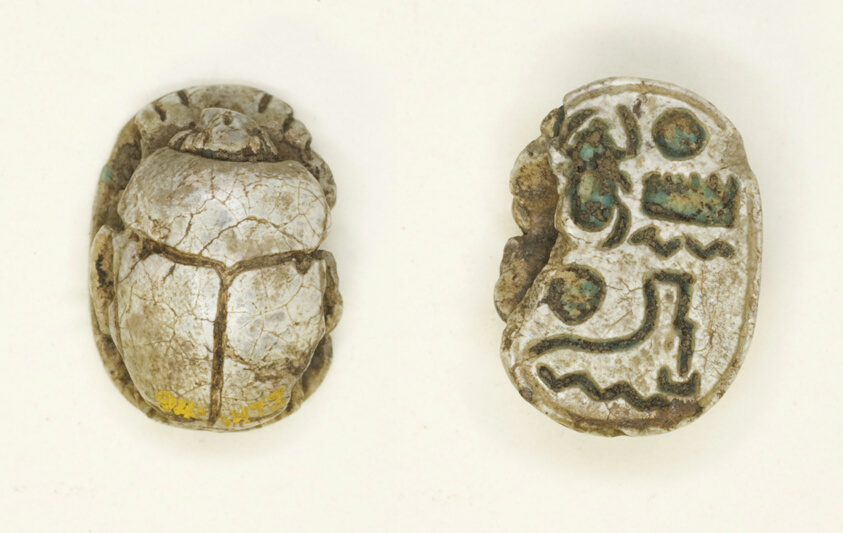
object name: Costume and Accessories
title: Scarab: Menkheperra (Thutmose III)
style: new kingdom, ramesside period, nineteenth dynasty, twentieth dynasty, ancient, egyptian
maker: Egyptian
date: New Kingdom, Ramesside Period, Dynasties 19–20 (about 1295–1069 BCE)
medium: Glazed steatite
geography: Egypt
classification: scarab; ancient art; costume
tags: scarab beetle, kings, king, insects, Hieroglyphs